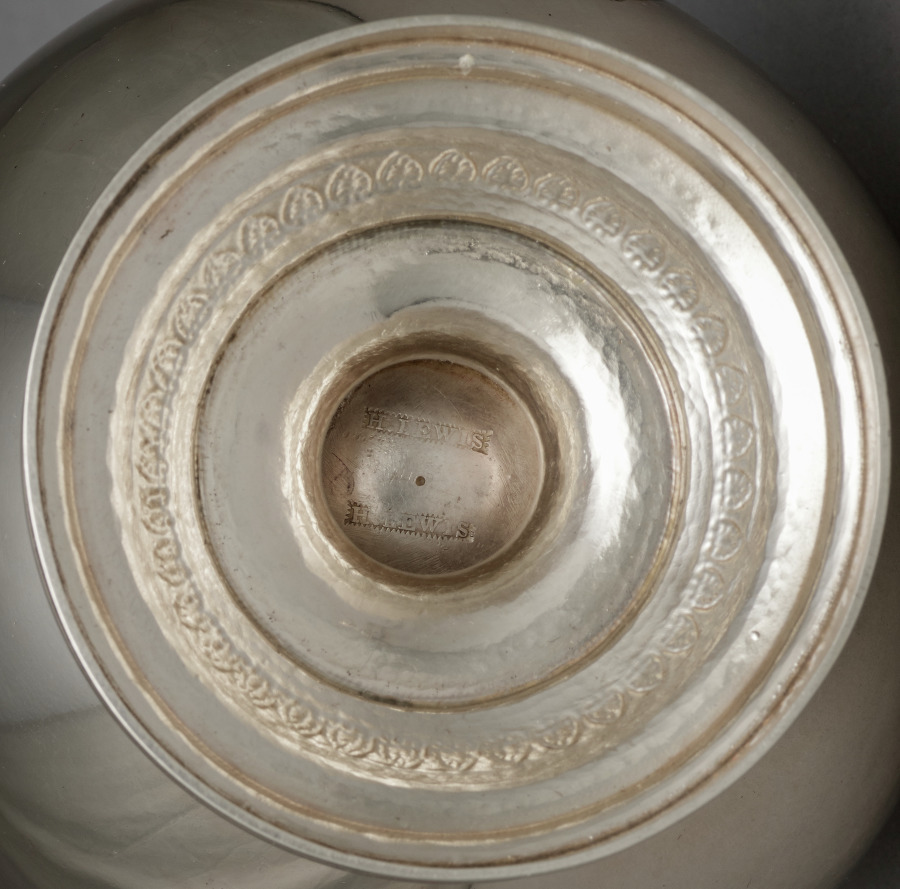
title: Sugar Urn with Cover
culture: America, Pennsylvania, Philadelphia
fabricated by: Harvey Lewis (American, 1835)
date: c. 1811–25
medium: silver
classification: Silver